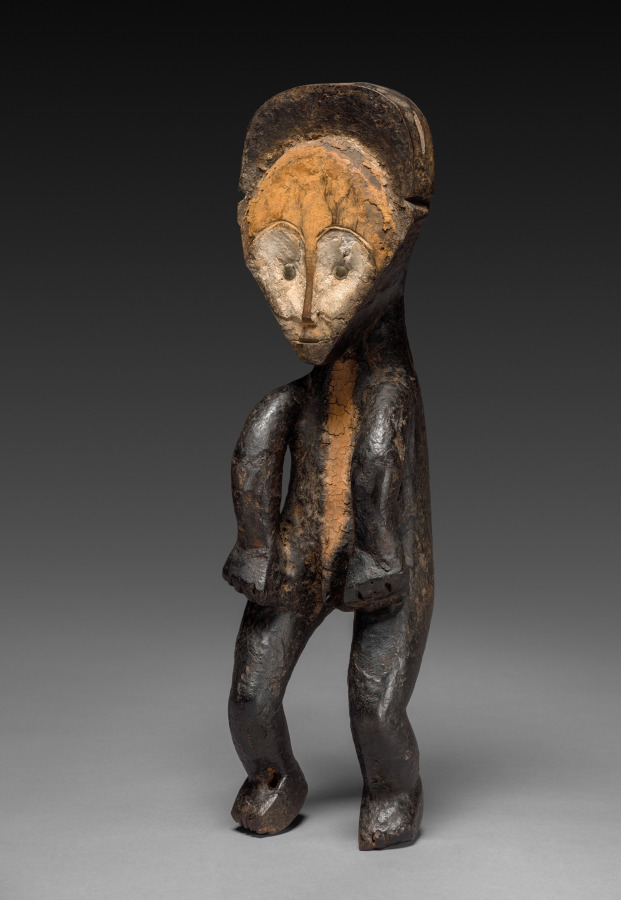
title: Male Figure (Ofika)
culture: Africa, Central Africa, Democratic Republic of Congo, Mbole-style carver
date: late 1800s or early 1900s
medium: Wood, colorant, and upholstery studs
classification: Sculpture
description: Figures such as this, known as ofika, were central to the initiation practices and the enforcement of laws among the all-male Lilwa association, a hierarchical organization that served educational, judicial, political, economic, and ritual functions among the Mbole. Meant to instill a moral code and to act as a cautionary symbol during initiation for Lilwa novices, ofika figures are believed to represent criminals who were ritually hanged for transgressions against Lilwa laws. The figure’s encrusted surface imitates how members covered their bodies with a substance made of ashes and palm oil during burial rites.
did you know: The stripe painted down the figure's torso represents the cord used for execution.